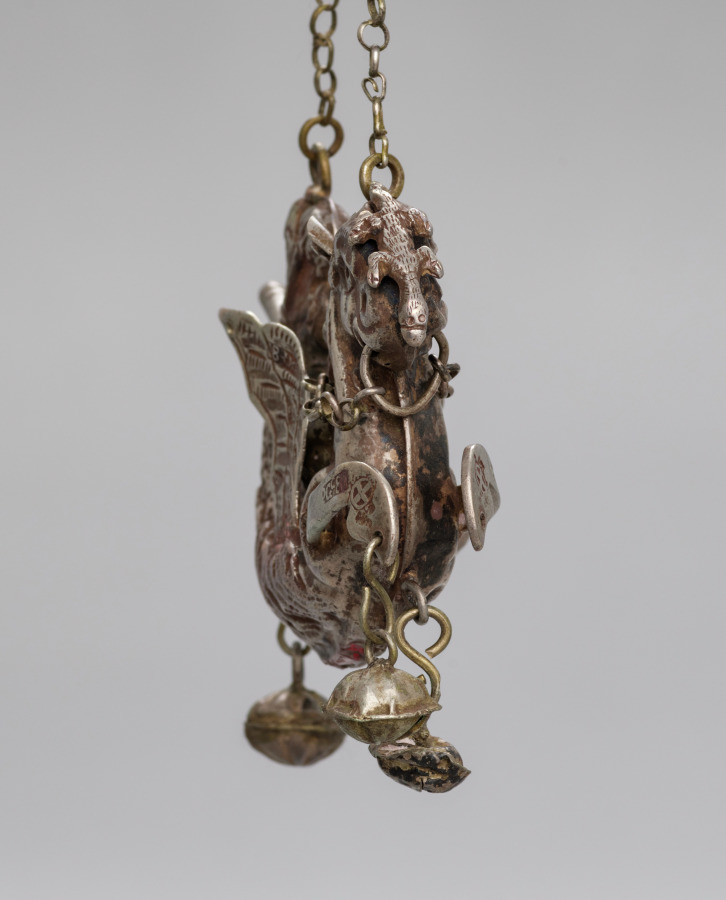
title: Rattle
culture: Italy, Sicily, 18th century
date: 1700s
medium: silver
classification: Silver